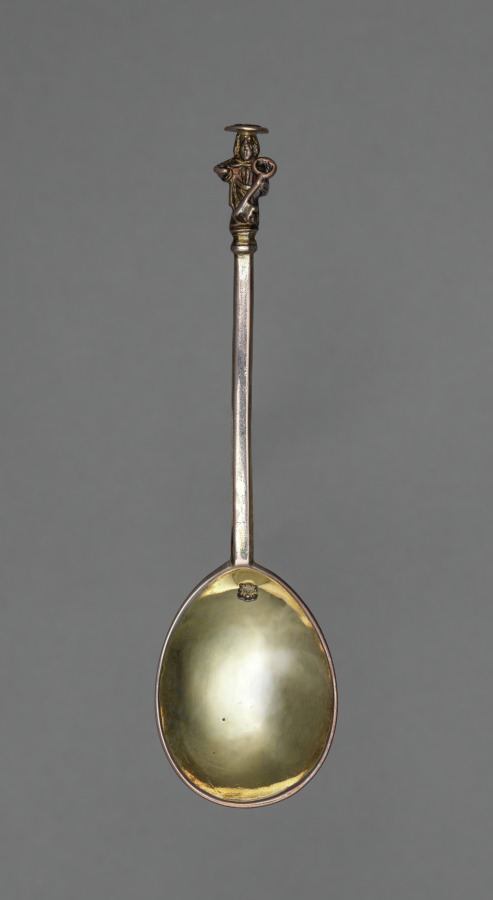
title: Apostle Spoon: St. Peter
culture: England, London, 17th century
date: 1622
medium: silver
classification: Silver